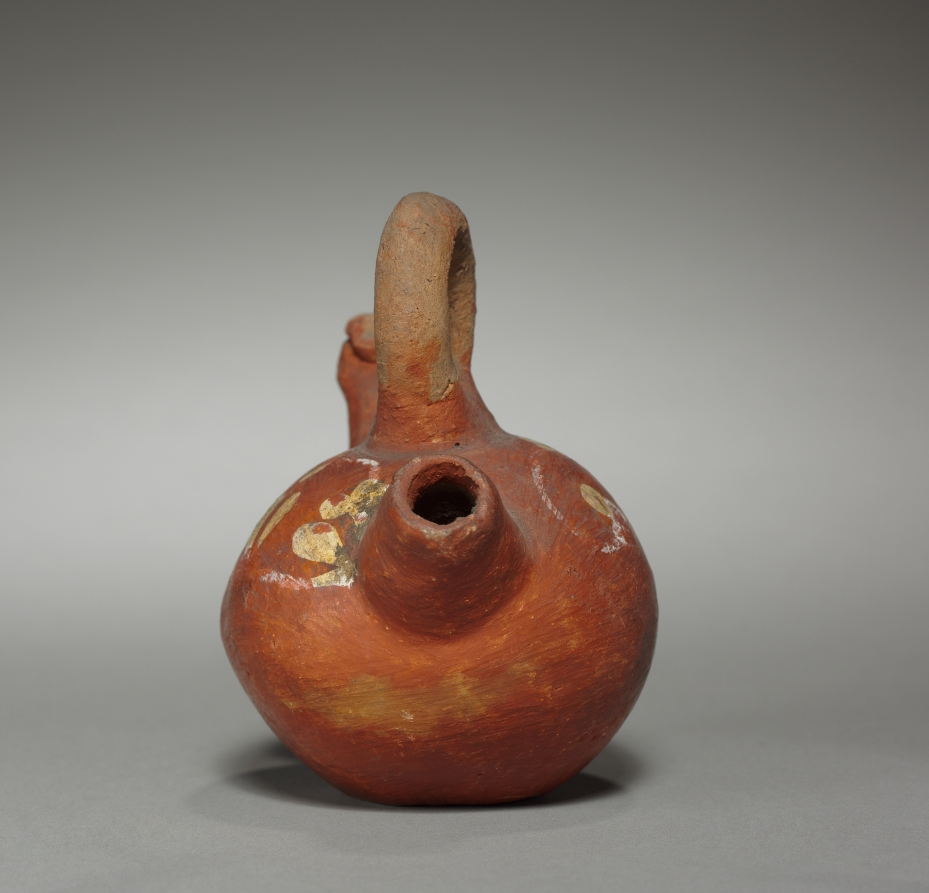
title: Bottle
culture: Peru, 20th century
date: 1900–1920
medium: pottery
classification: Ceramic